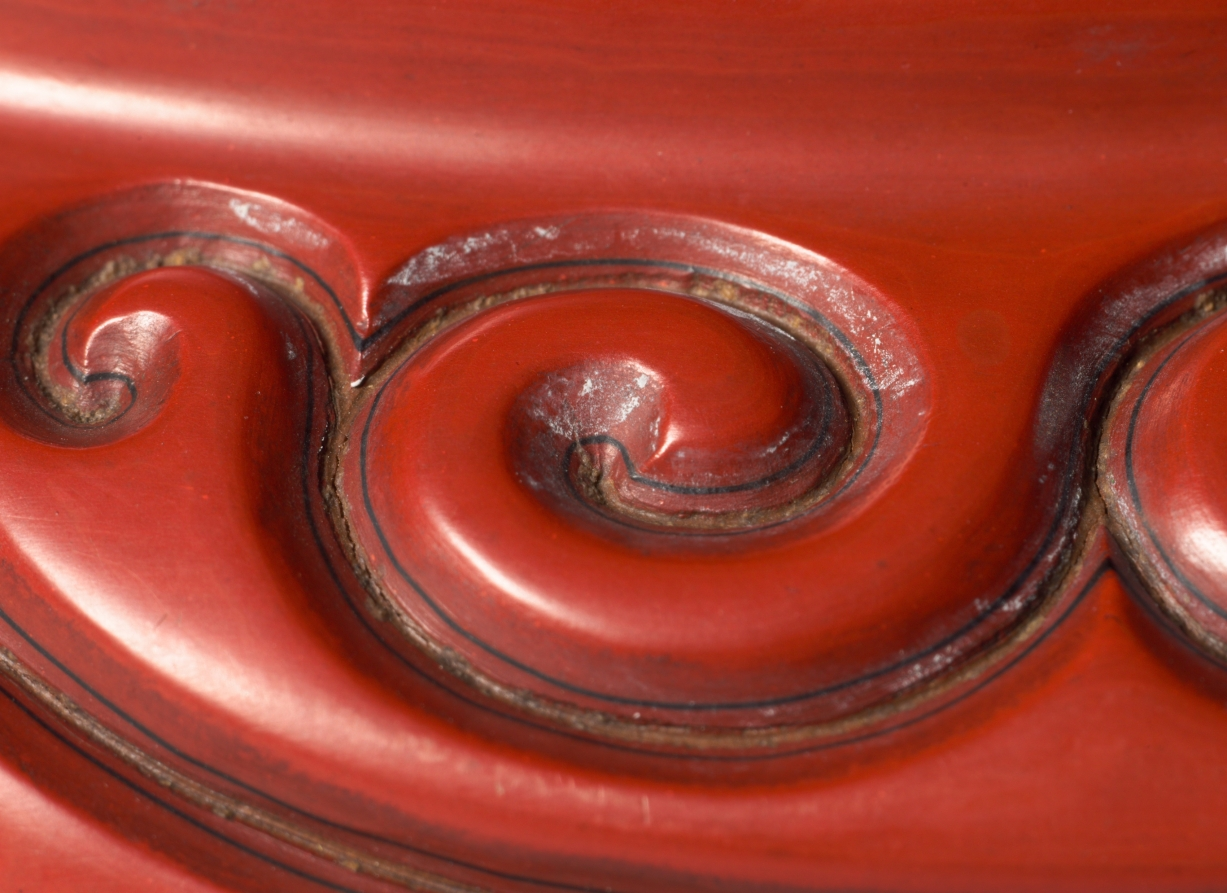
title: Plate with Peony Decoration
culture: China, Yuan dynasty (1271-1368)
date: late 1300s–early 1400s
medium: carved cinnabar lacquer on wood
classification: Lacquer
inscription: Signature incised on bottom: Yang Mao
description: This lacquer dish of strikingly deep red color is decorated with a dynamically carved design of three peony blossoms. Because of the complexity in lacquer production, items are often small and were seldom made for daily use. Lacquer was traditionally made using the sap of the lacquer tree found in southern China. Many successive layers of lacquer would be applied until the surface could be carved into complex geometric or figural forms. Red became the preferred color for lacquerware carvings, in part because the color has long been associated with good fortune in China.